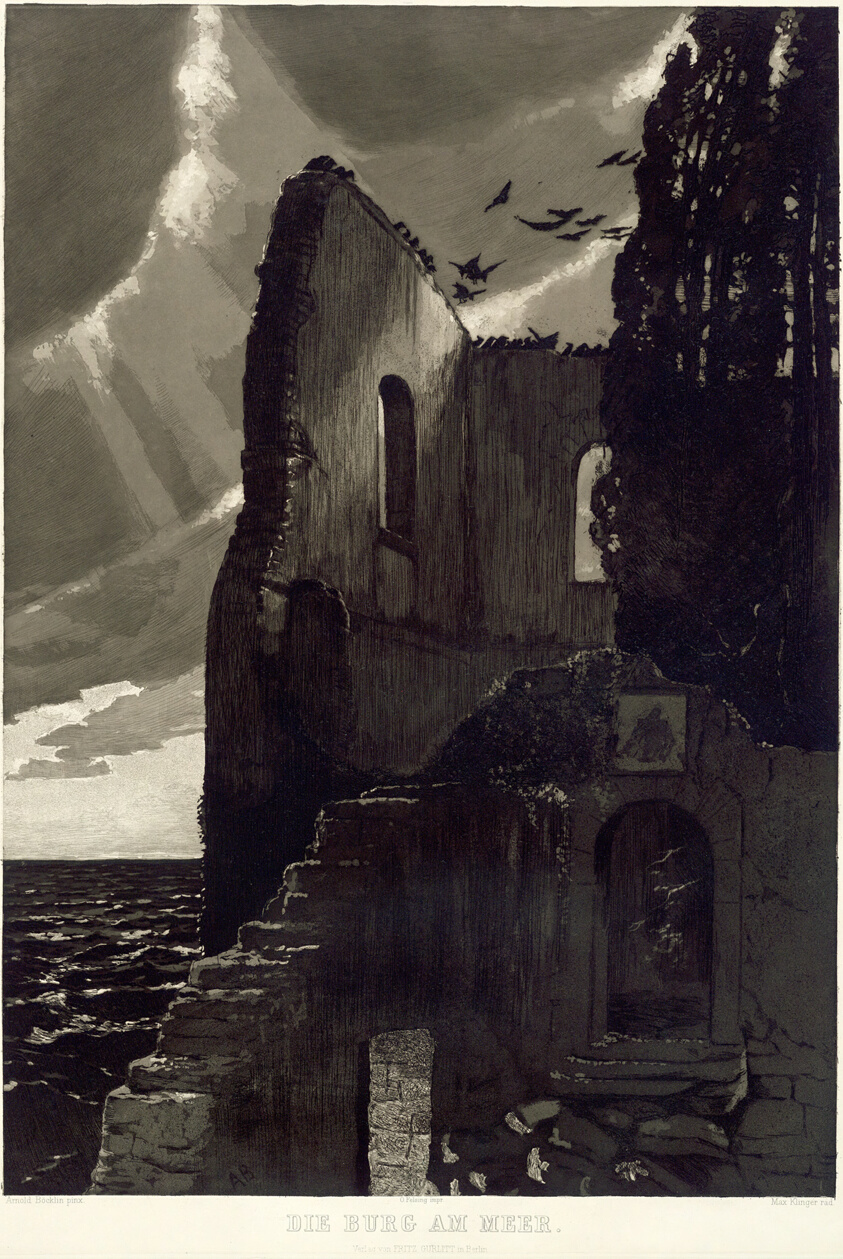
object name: Print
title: The Castle by the Sea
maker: Max Klinger (German, 1857-1920); after Arnold Böcklin (Swiss, 1827-1901)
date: 1887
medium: Etching and aquatint on ivory wove paper, laid down on ivory wove paper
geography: Germany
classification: etching; print; prints and drawing